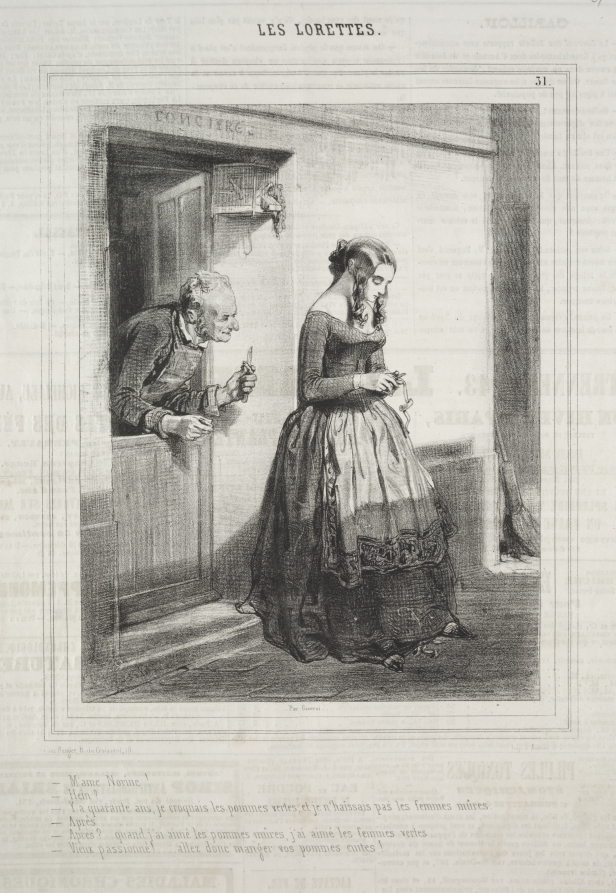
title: Les Lorettes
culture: France, 19th century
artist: Paul Gavarni (French, 1804–1866)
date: 1842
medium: lithograph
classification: Print